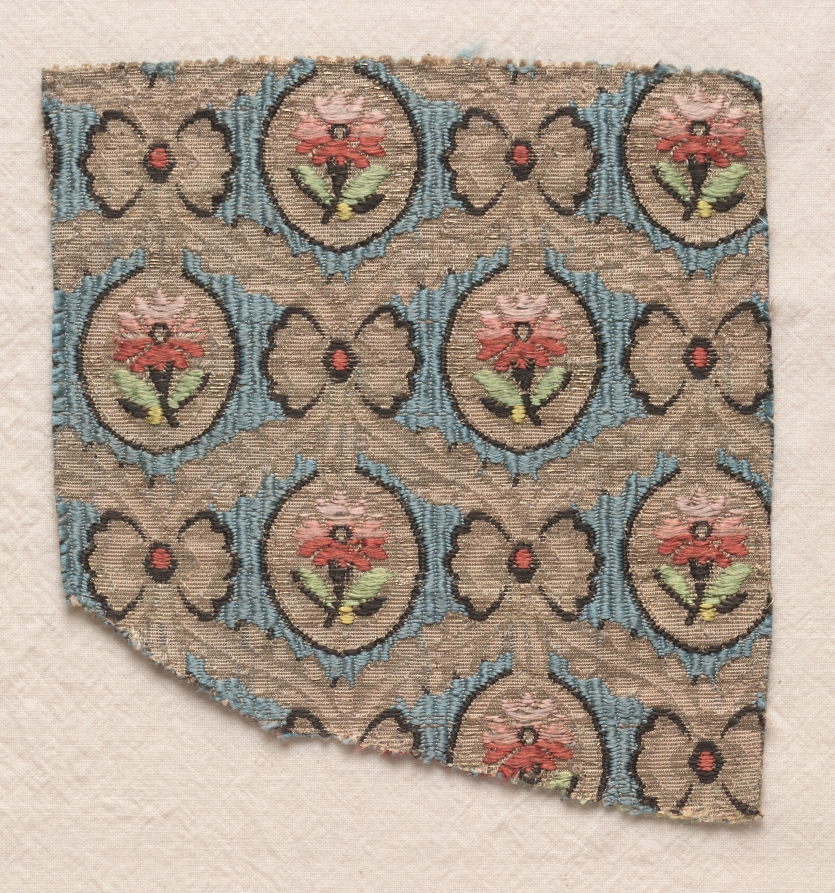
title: Textile Fragment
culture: France, late 18th century, Period of Louis XVI (1774-1793)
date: 1774–1793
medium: Droguet; silk and gold thread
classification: Textile